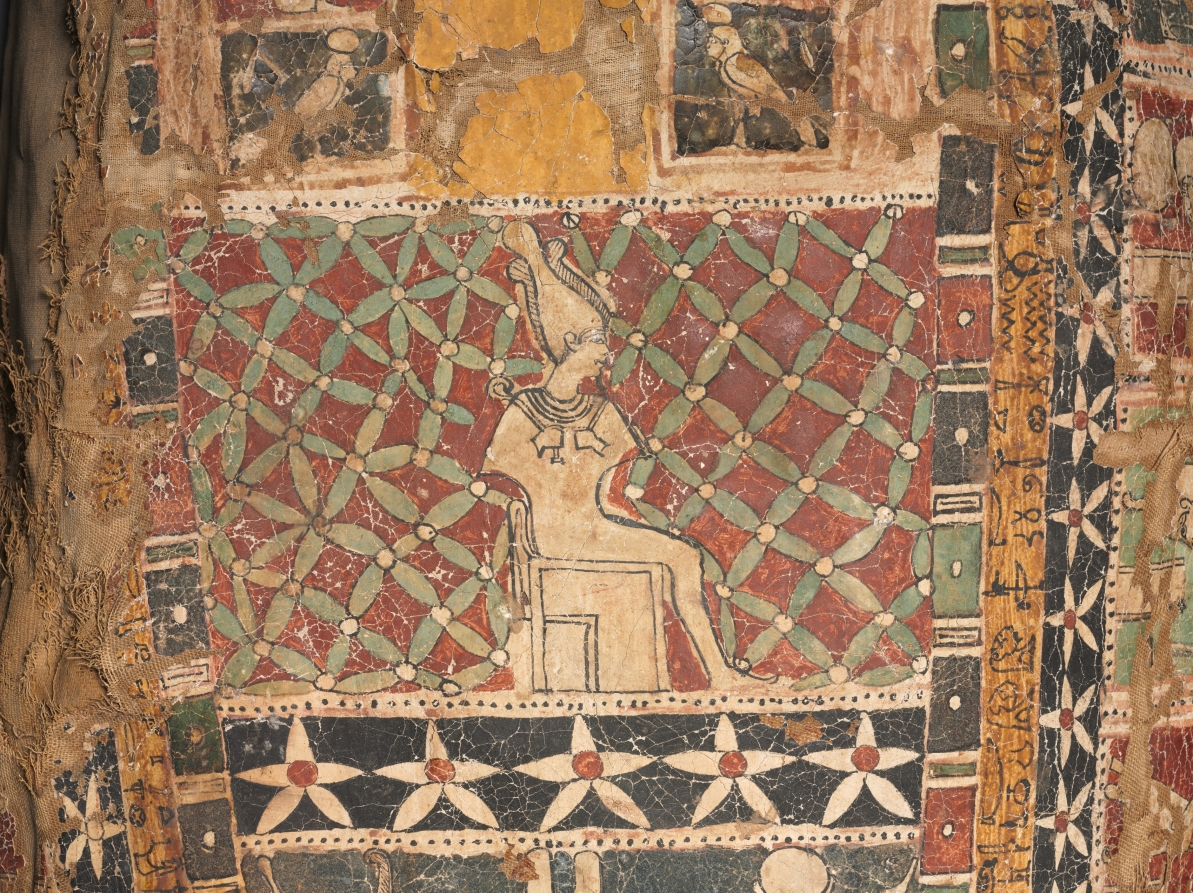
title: Cartonnage Mummy Case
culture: Egypt, Greco-Roman period (332 BCE–395 CE), Ptolemaic dynasty (305–30 BCE)–Roman empire (30 BCE–395 CE)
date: c. 50 BCE–50 CE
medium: cartonnage, painted and gilded, with glass inlays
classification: Funerary Equipment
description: This mummy case is made of cartonnage, a material similar to papier-mâché, but using layers of linen rather than paper. Cartonnage mummy cases such as these are contemporary with funerary portraits painted on wood or linen, although they present a very different appearance. The face, modeled in plaster, is bland and idealized, although the effect of the gilding and glass inlays is quite dazzling. The body is painted with traditional, age-old funerary motifs: the god Osiris, seated and mummiform; the fetish of Abydos, holy city of Osiris, flanked by standing deities (Thoth and Shu); a Horus falcon with outspread wings, and the bark of Sokar. Below these are the sandaled feet of the deceased. On the sides are rows of seated deities. On the top of the head are a winged scarab beetle flanked by Anubis jackals. On the foot are painted the soles of the deceased’s sandals, flanked by scorpions for protection.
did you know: This coffin is smaller and later in date than the other coffins in this gallery. It is made of cartonnage, which used layers of linen to create a material similar to papier-mâché. The painted portrait head displays the influence of Roman portraiture at this time and incorporates both gilding and glass inlays. Despite the fragile materials, this mummy case survived due to the very dry desert climate in which it was found.